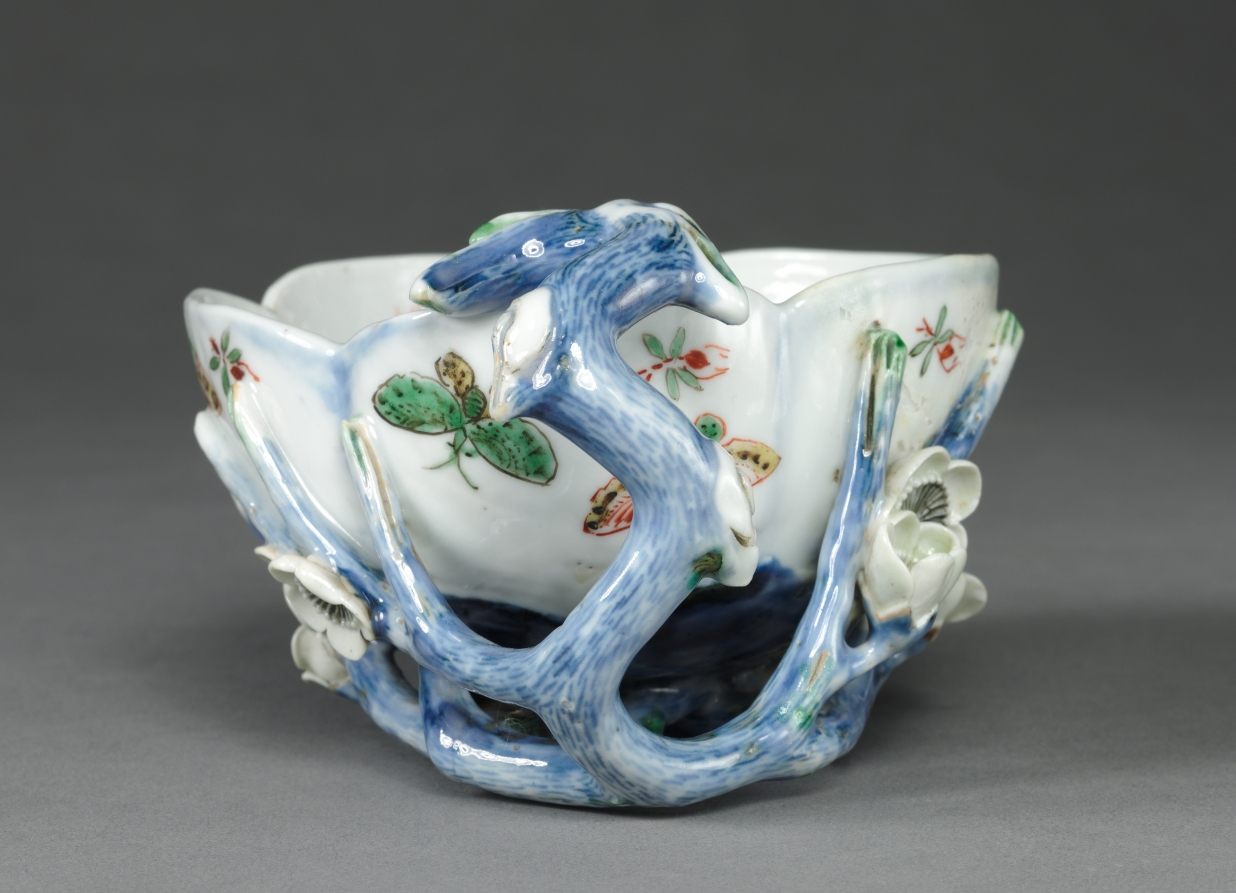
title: Plum Blossom Cup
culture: China, Jiangxi province, Jingdezhen kilns, "Transitional period", Ming dynasty (1368-1644), Tianqi reign (1621-1627)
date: 1621–27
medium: porcelain with underglaze blue and wucai (five color) overglaze enamel decoration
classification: Ceramic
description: This porcelain cup is considered to have been made in the "Transitional period," a term used to define the period between about 1620 and 1683 when official kilns in Jingdezhen were no longer under imperial supervision due to the transition from the Ming to the Qing dynasties.